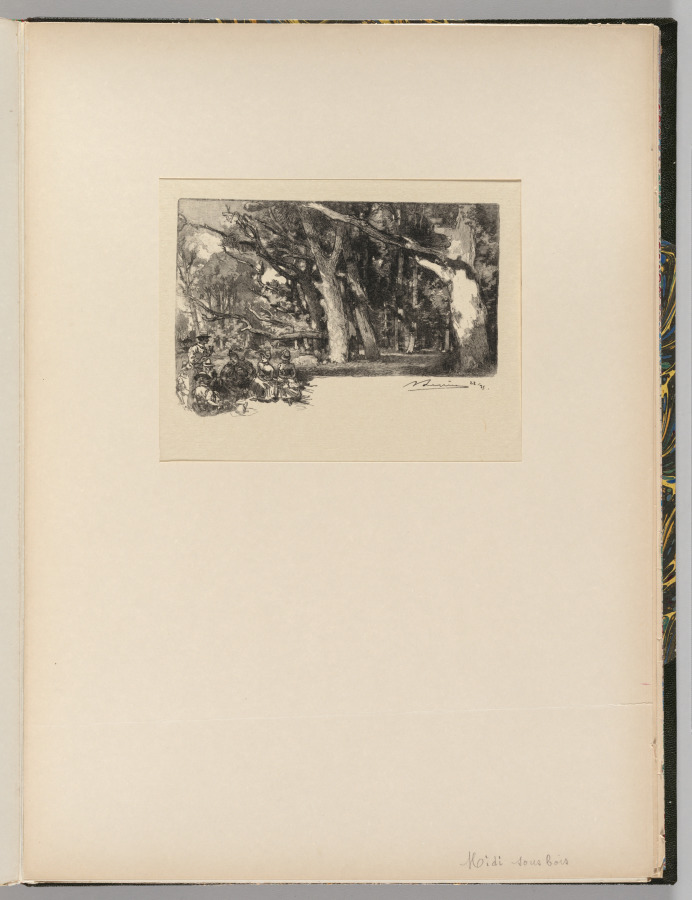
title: Fontainebleau Forest: Noon under the Trees (La Forêt de Fontainebleau: Midi sous bois)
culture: France, 19th century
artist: Auguste Louis Lepère (French, 1849–1918)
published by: A. Desmoulins, Published in Revue Illustrée, 1887–90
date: 1890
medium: wood engraving from bound volume of 34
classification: Bound Volume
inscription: In block, lower right: A, Lepère del. sc; below image, lower right, in black ink: ALepère 22/35; on window mat, lower right, in graphite: Midi sous bois